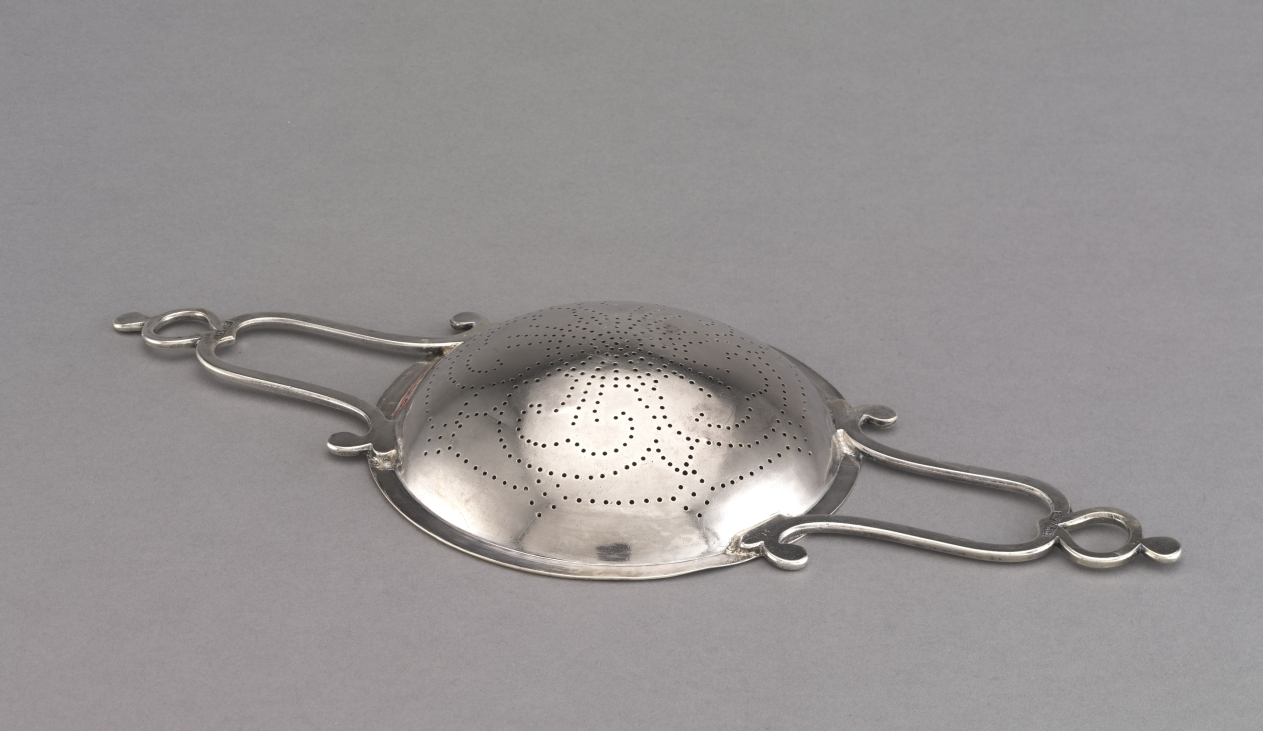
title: Strainer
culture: America, Massachusetts, Boston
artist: Paul Revere II (American, 1735–1818)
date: c. 1760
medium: silver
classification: Silver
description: A strainer was used to remove lemon seeds, cloves, and other debris from punch.